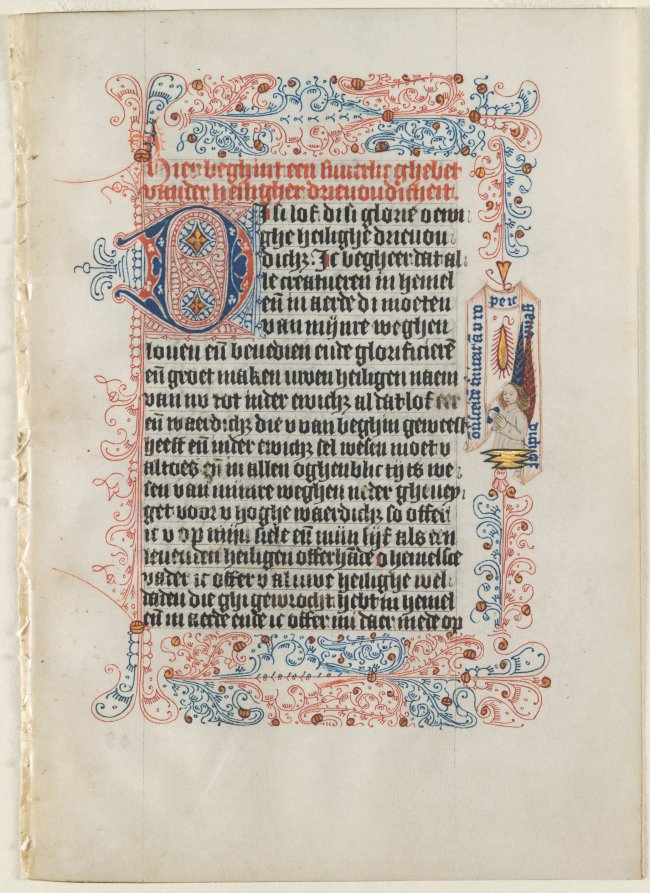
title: Leaf Excised from a Book of Hours: Angel with a Banderole within a Flourished Border (Prayer to the Holy Trinity)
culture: North Netherlands, Delft, 15th century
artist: possibly by Workshop of the Convent of St. Agnes (Netherlandish)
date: c. 1475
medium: ink, tempera, and gold on vellum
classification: Manuscript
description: This leaf provides an excellent example of the high point of the penmanship for which Delft manuscripts were famous. The red and blue penwork flourishes filling the margins of the page belong to what Dutch scholars call the "block group," in which the borders are made up of a number of formal geometric compartments, each tightly filled in with contrasting penwork. This form of decoration appears to be unique to books of hours and breviaries produced in Delft, and therefore points unambiguously to that city as its place of production. An additional feature of this group of manuscripts is the use of emblematic borders in the form of figures with banderoles. These generally relate in some didactic way to the subjects of the texts or main miniatures. Many Delft devotional manuscripts were associated with religious houses that decorated books for the secular market. These included the Augustinian convent of Saint Agnes and the Brothers of the Common Life at Saint Hieronymusdal. Saint Agnes herself was listed in the calendar of the original manuscript for January 21. The text follows Geert Groote’s (died 1384) translation of the book of hours into Dutch. The Netherlands was the only region within Europe in which the vernacular replaced Latin in the book of hours.